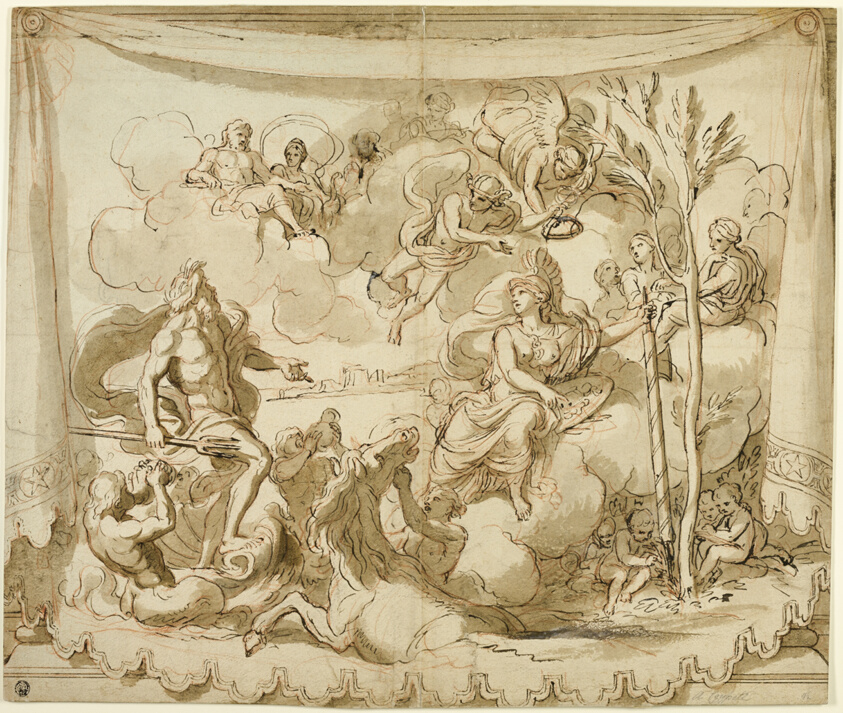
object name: Drawing and Watercolor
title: Neptune and Minerva Discussing the Foundation of Athens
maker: Attributed to or a follower of Charles Le Brun; French, 1619-1690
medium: Pen and brown ink, with brush, brown wash and red chalk, on cream laid paper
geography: France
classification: pen and ink drawings; drawings (visual works); prints and drawing